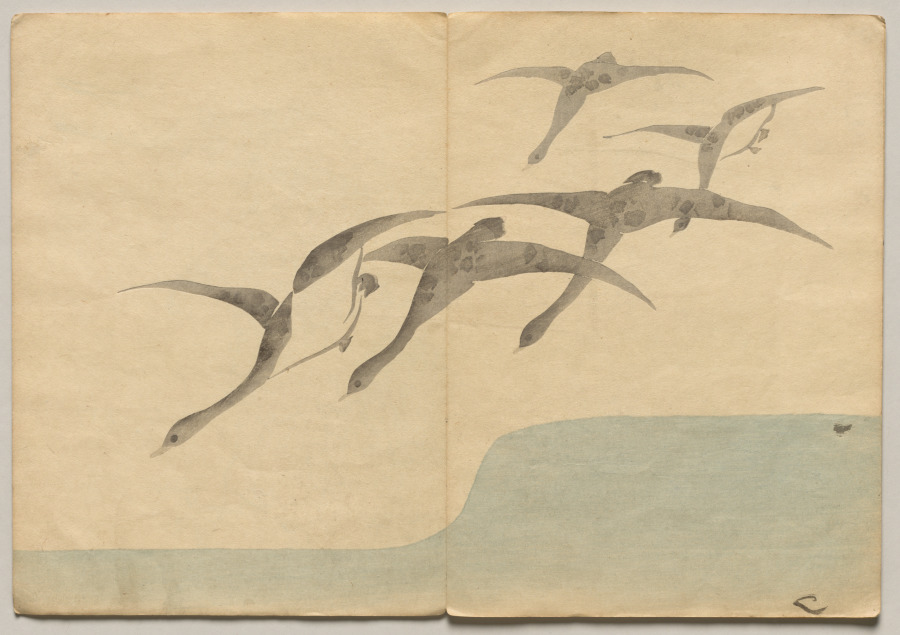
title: Scene from The Kōrin Picture Book (Volume 1)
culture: Japan, Edo period (1615–1868)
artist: Nakamura Hōchū (Japanese, d. 1819)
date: 1800s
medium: color woodblock printed book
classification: Bound Volume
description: Ogata Korin (1658-1716) was one of the most admired artists of Rimpa, or "decorative school painting." These books by the charming later-generation Rimpa artist Hochu record Korin's inventive designs.